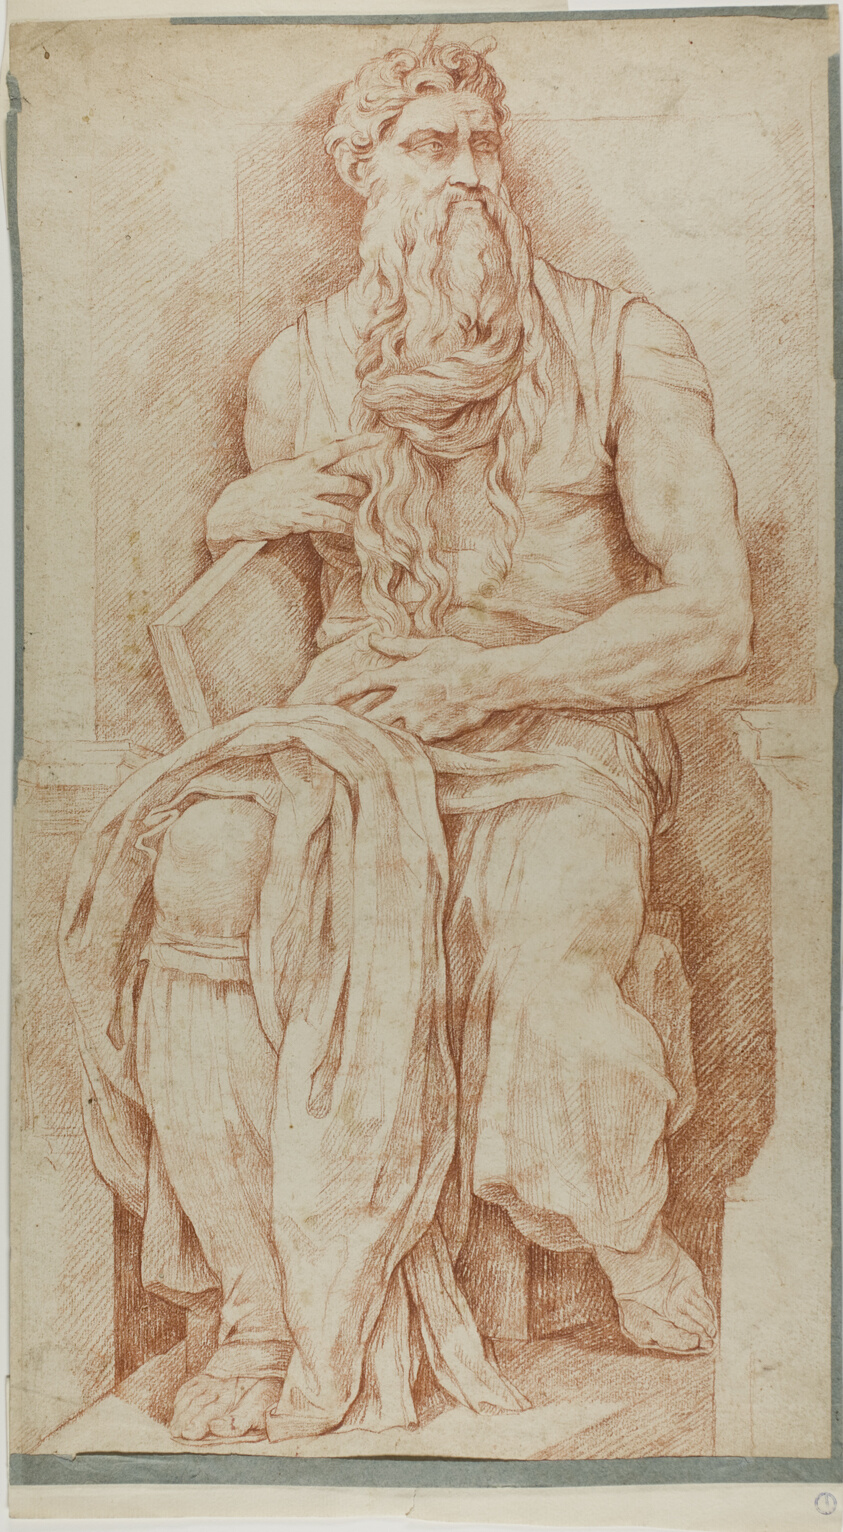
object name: Drawing and Watercolor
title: Moses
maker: after Michelangelo Buonarroti; Italian, 1475-1564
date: 1700s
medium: Red chalk on ivory laid paper, laid down on gray wove paper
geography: Italy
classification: chalk; drawings (visual works); prints and drawing